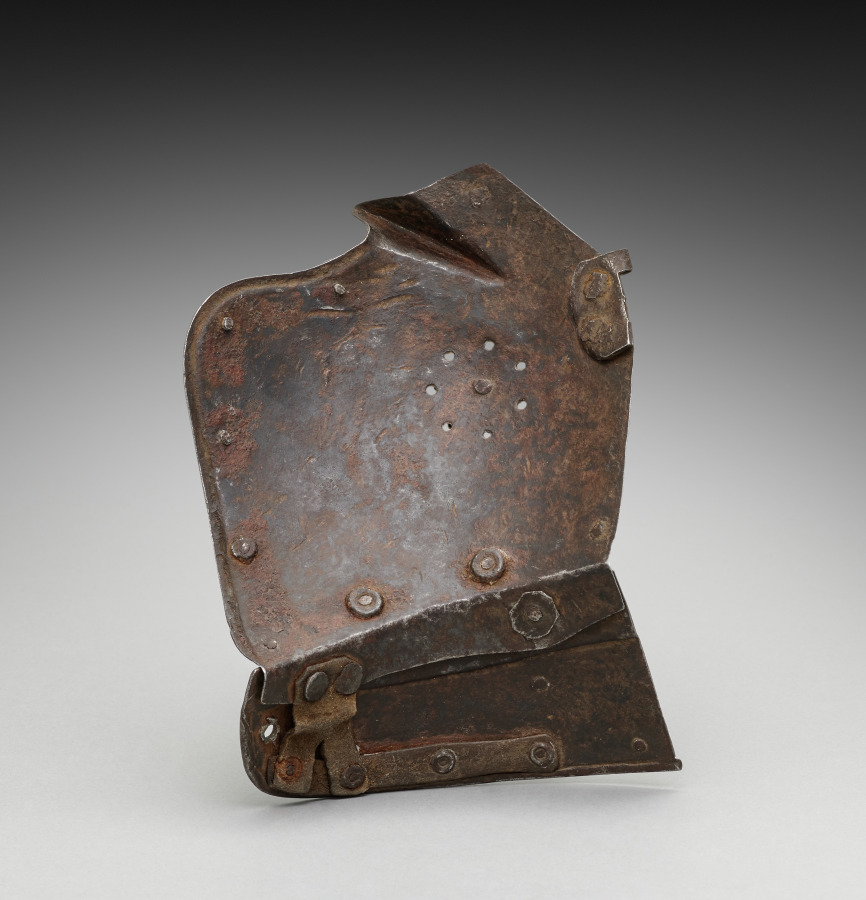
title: Ear Piece of a Helmet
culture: Germany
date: 1500s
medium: steel, brass headed rivets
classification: Arms and Armor